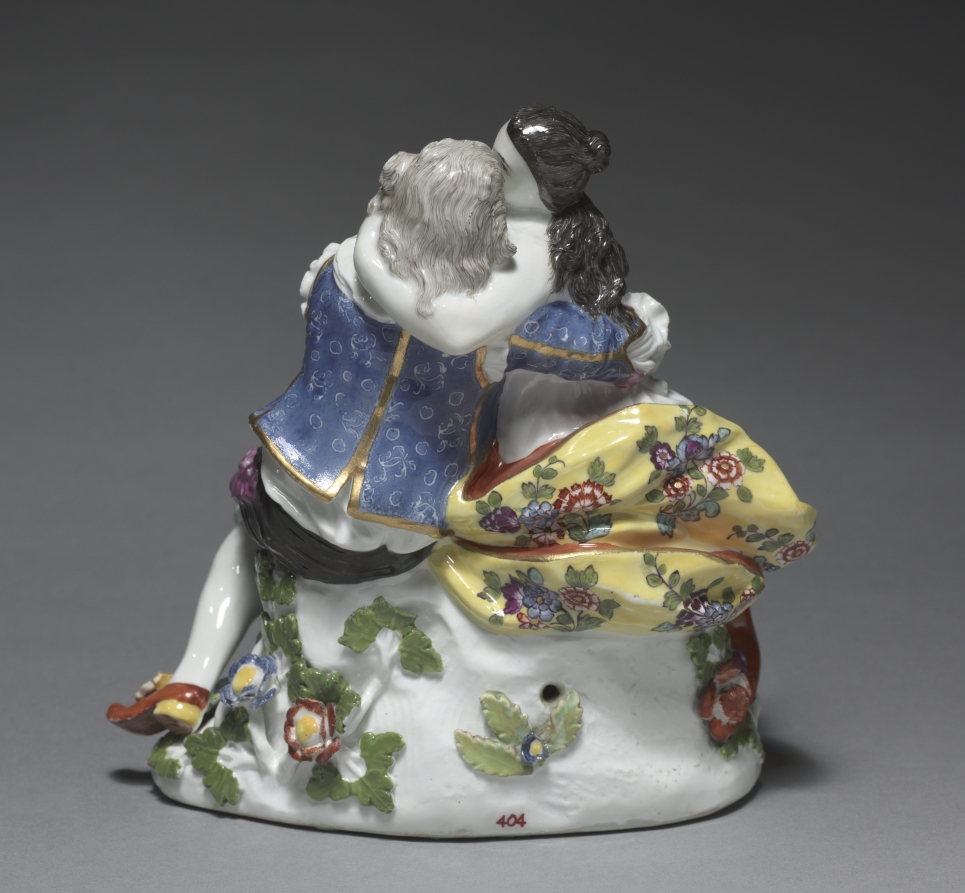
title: The Lovers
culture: Germany, Meissen, 18th century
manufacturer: Meissen Porcelain Factory (German, est. c. 1710)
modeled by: Johann Friedrich Eberlein (German, 1696–1749)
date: c. 1740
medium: porcelain with enamel decoration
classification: Ceramic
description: Though closely related to the style of modeling developed at Meissen by Kaendler, this group was executed by his chief assistant, Eberlein. The intense colors of the figural decorations are characteristic of Meissen production before about 1750.